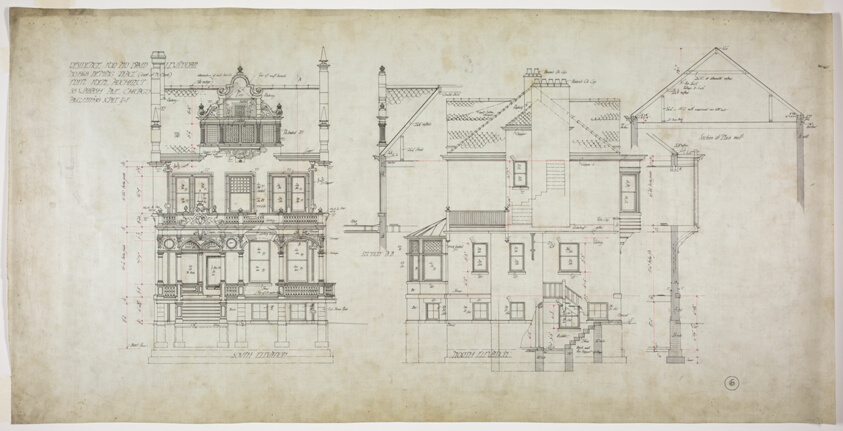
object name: Architectural Drawing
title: David Lewinsohn House, Chicago, Illinois, North and South Elevations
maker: Fritz Frederick L. Foltz (American, born Germany, 1843–1915)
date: 1898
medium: Ink on linen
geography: Chicago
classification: working drawing; architectural drawing